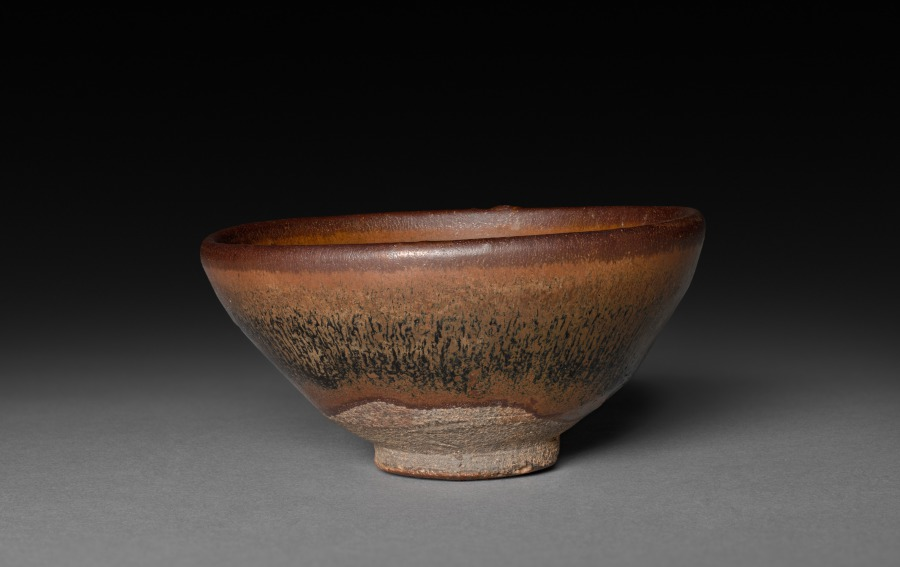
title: Tea Bowl: Jian ware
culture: China, near Shui ch'i, Song dynasty (960-1279)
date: 960–1279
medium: purplish brown stoneware with iron slip glaze coating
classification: Ceramic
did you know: Jian ware was very popular with the tea cultures in China and Japan.